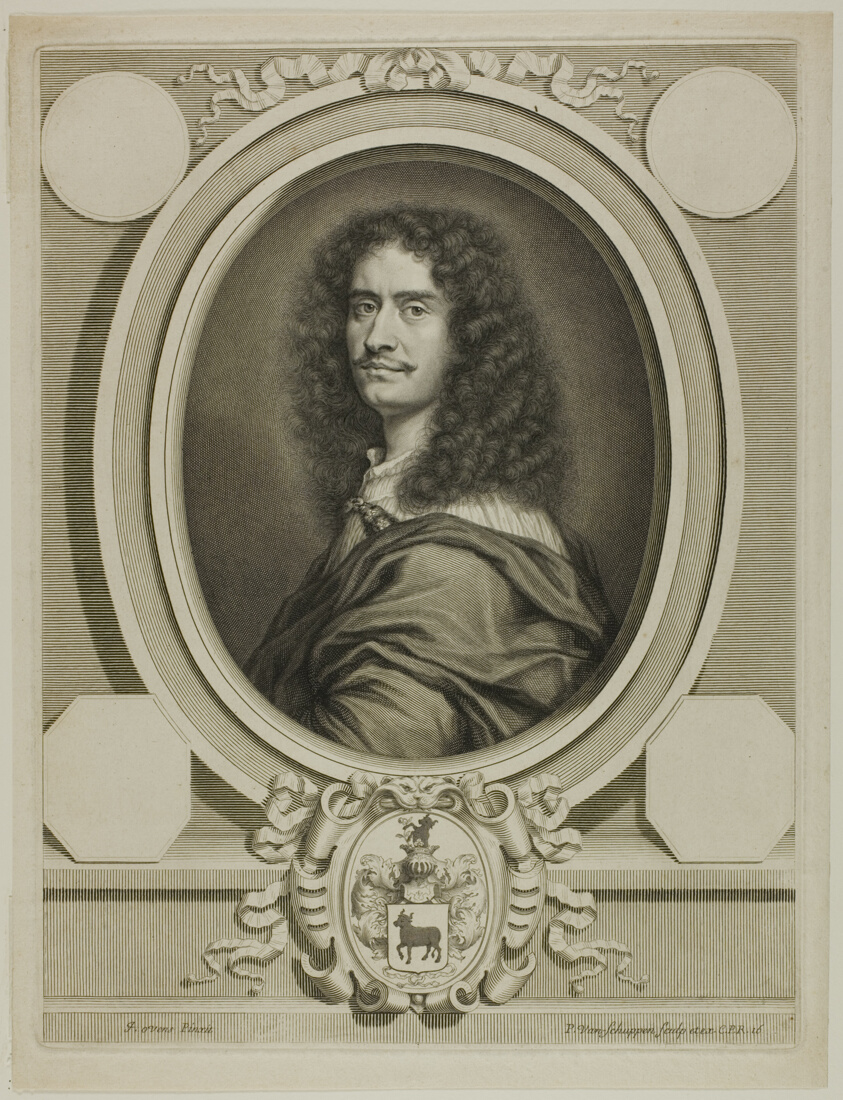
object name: Print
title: Joseph-François Borri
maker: Pierre Louis van Schuppen (Flemish, 1627-1702); after Jürgen Ovens (Danish 1623-1678)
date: 1662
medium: Engraving on paper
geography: Flanders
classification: print; prints and drawing